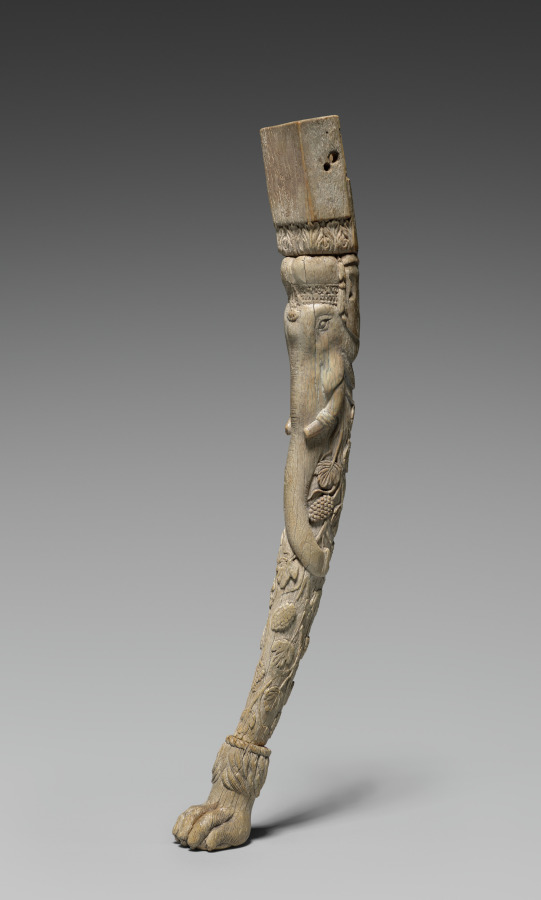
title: Chair Leg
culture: Afghanistan, Begram, Kushan period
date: 300s CE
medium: ivory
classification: Ivory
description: This ivory carving was made to sheath wooden furniture made in India for trade along the Silk Road, which stretched from Rome to China. Indian ivory-faced furnishings--along with lacquer boxes from China and painted glass from Rome--were found in an extraordinary deposit of luxury goods at a site called Begram. The wood on which the ivory and lacquer were affixed has long disintegrated, and only the small pieces remain.